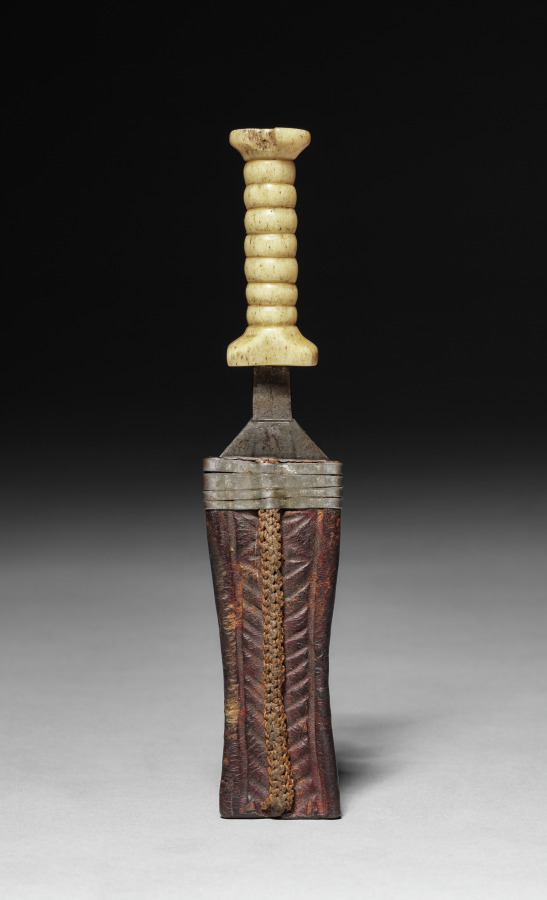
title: Dagger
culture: Africa, Central Africa, Democratic Republic of the Congo, Mangbetu-style maker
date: 1900s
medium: Iron, elephant ivory, leather, and tin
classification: Arms and Armor